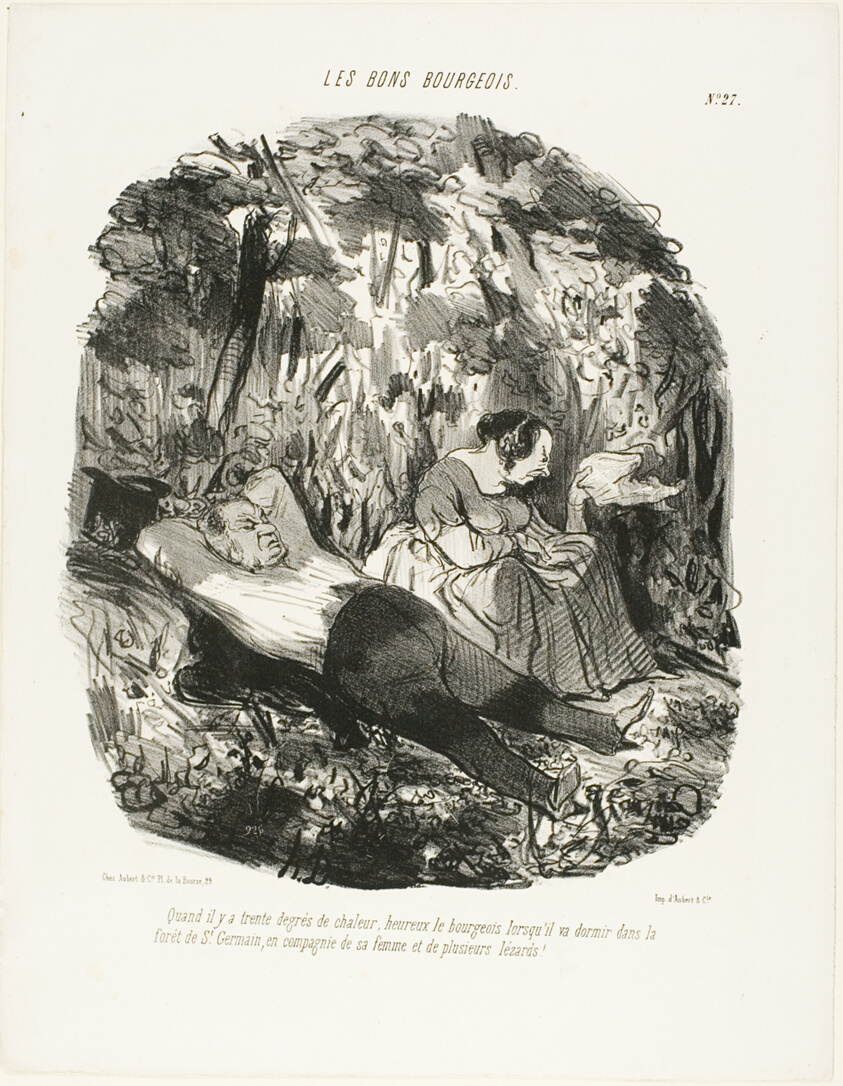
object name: Print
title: At 30°C, lucky he who can escape and snooze in the forest of Saint-Germain accompanied by his wife and a few lizards, plate 27 from Les Bons Bourgeois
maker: Honoré Victorin Daumier; French, 1808-1879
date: 1847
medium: Lithograph in black on white wove paper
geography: France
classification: lithograph; print; prints and drawing